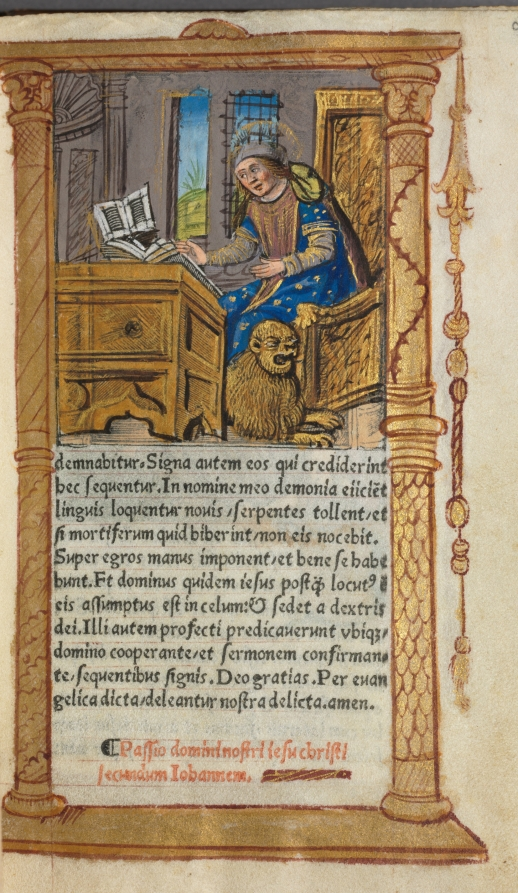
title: Printed Book of Hours (Use of Rome): fol. 20r, St. Mark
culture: France, Paris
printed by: Guillaume Le Rouge (French, Paris, active 1493–1517)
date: 1510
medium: 112 Printed folios on parchment, bound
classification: Bound Volume